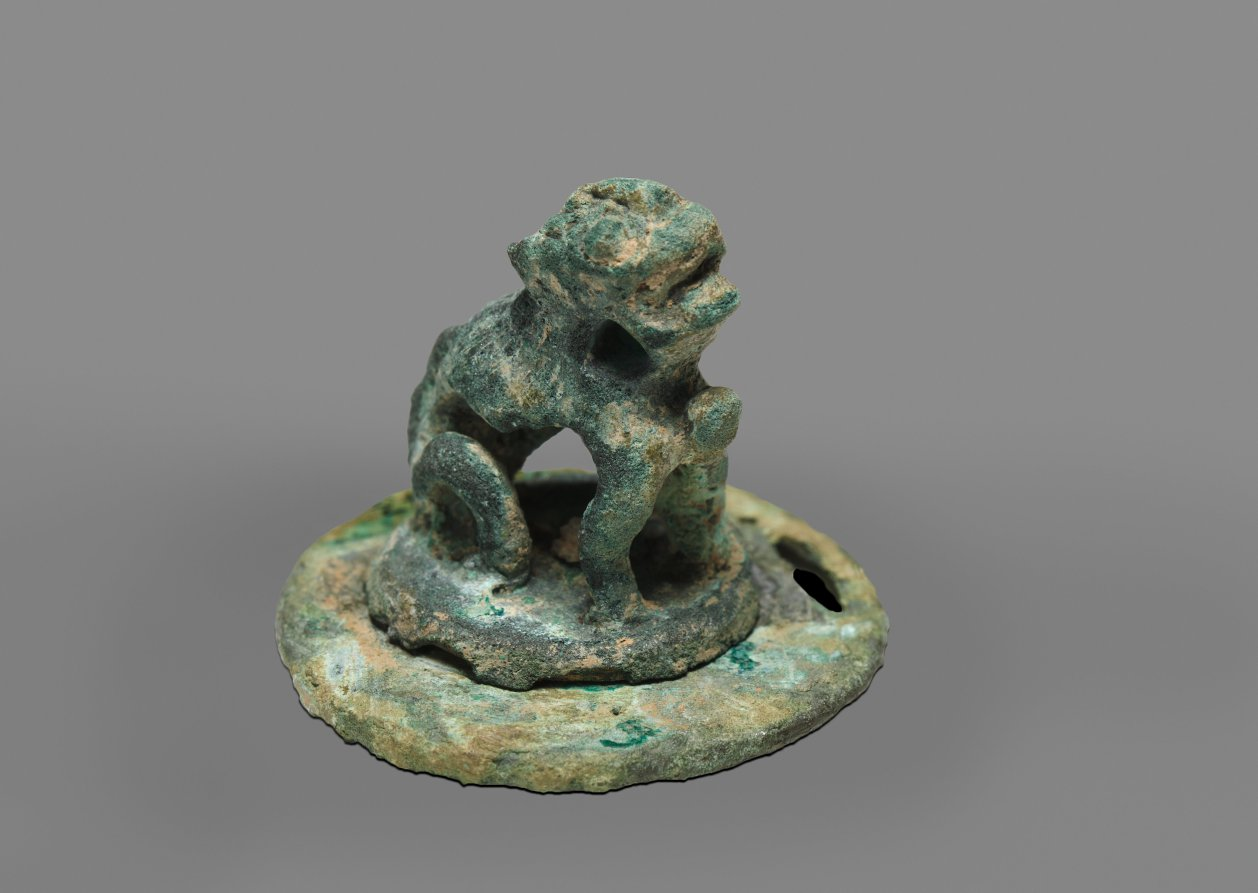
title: Seal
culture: Korea, Goryeo dynasty (918–1392)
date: 918–1392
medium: bronze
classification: Metalwork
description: A large quantity of bronze seals were excavated from tombs of the Goryeo dynasty. This bronze seal appears to have been used for stamping the sealed envelopes of letters. The lion-shaped ornament serves as the handle of the seal. While it is much corroded, the face and tail of the seated lion gazing upward are delicately expressed. Beneath the face of the lion is a hole through which a string can be threaded.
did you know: A large quantity of bronze seals excavated from tombs of the Goryeo dynasty is closely related to the development of metallurgy in 13th-century Korea that allowed the transition from wood type to movable metal type printing.